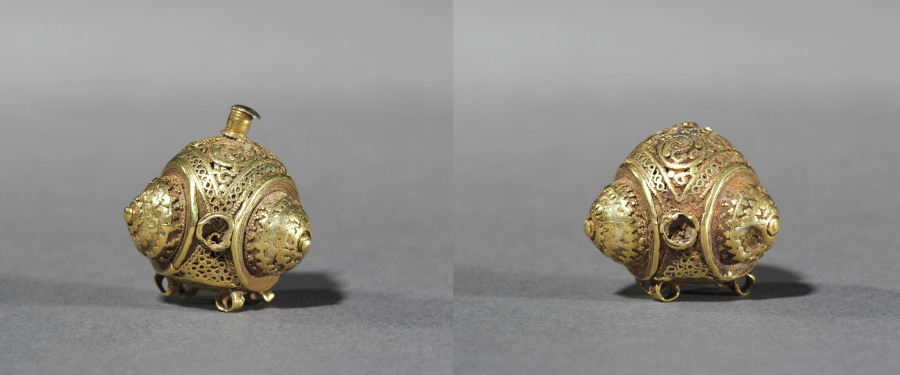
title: Pair of Buttons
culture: Iran, 10th-11th century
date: 900s–1000s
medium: gold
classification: Jewelry